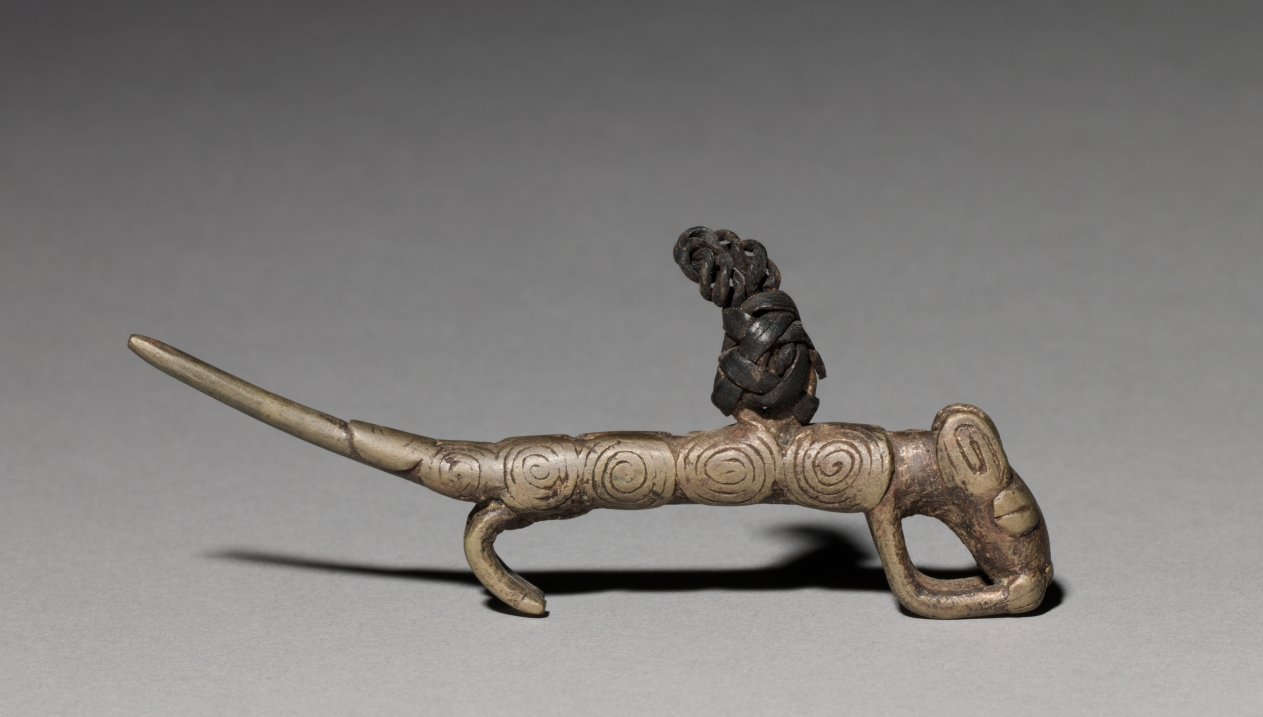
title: Animal Pendant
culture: Africa, West Africa, Burkina Faso, Tusyan-style maker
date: 1900s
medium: Copper alloy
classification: Jewelry